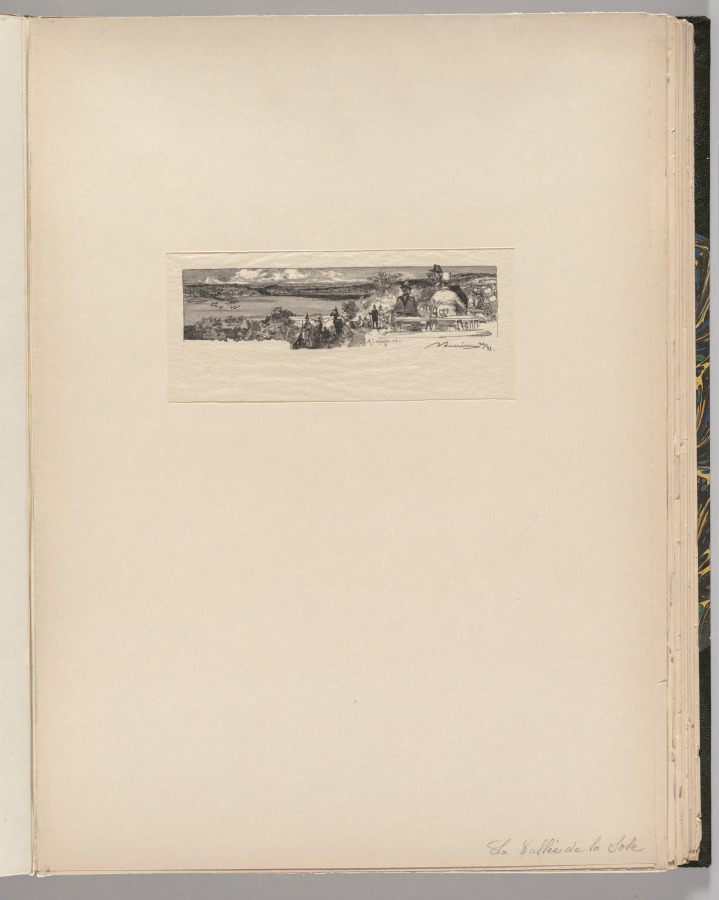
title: Fontainebleau Forest: Valley of the Solle (La Forêt de Fontainebleau: La Vallée de la Solle)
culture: France, 19th century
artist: Auguste Louis Lepère (French, 1849–1918)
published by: A. Desmoulins, Published in Revue Illustrée, 1887–90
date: 1890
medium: wood engraving from bound volume of 34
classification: Bound Volume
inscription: In block, near center: A. LEPERE Del. sc.; below image, lower right, in black ink: ALepère 22/35; on window mat, lower right, in graphite: La Vallée de la Sole